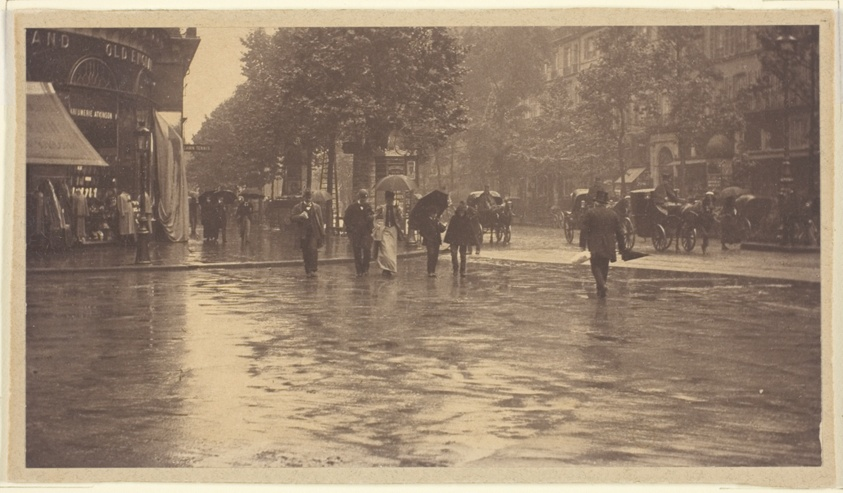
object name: Photograph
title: A Wet Day on the Boulevard, Paris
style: Pictorialism, 19th century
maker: Alfred Stieglitz (American, 1864-1946)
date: 1894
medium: Carbon print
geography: United States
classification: carbon print; pigment process; photographic process; photography; photograph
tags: Paris, cityscapes